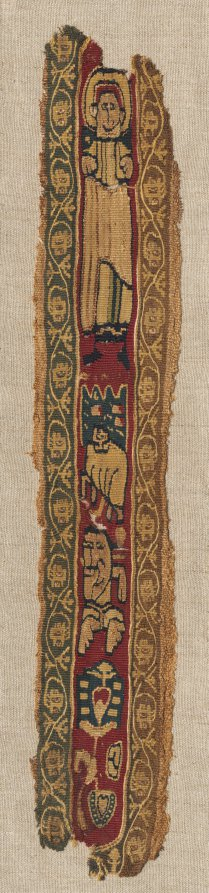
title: Fragment of a Clavus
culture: Egypt, Abbasid period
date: late 700s - early 800s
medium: tapestry; linen and wool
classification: Textile